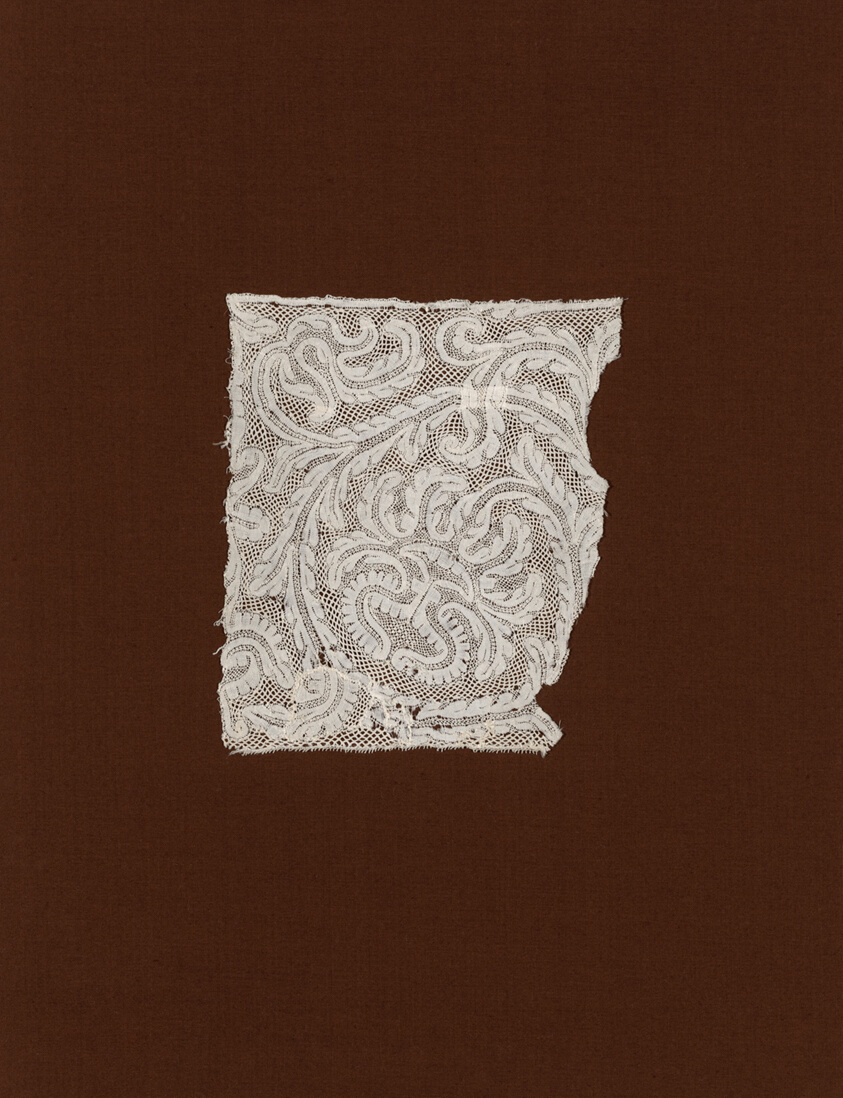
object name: Textile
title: Fragment (Border)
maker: Italy, Milan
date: 1650/1700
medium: Linen, bobbin part-lace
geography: Italy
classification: textile; lace - bobbin